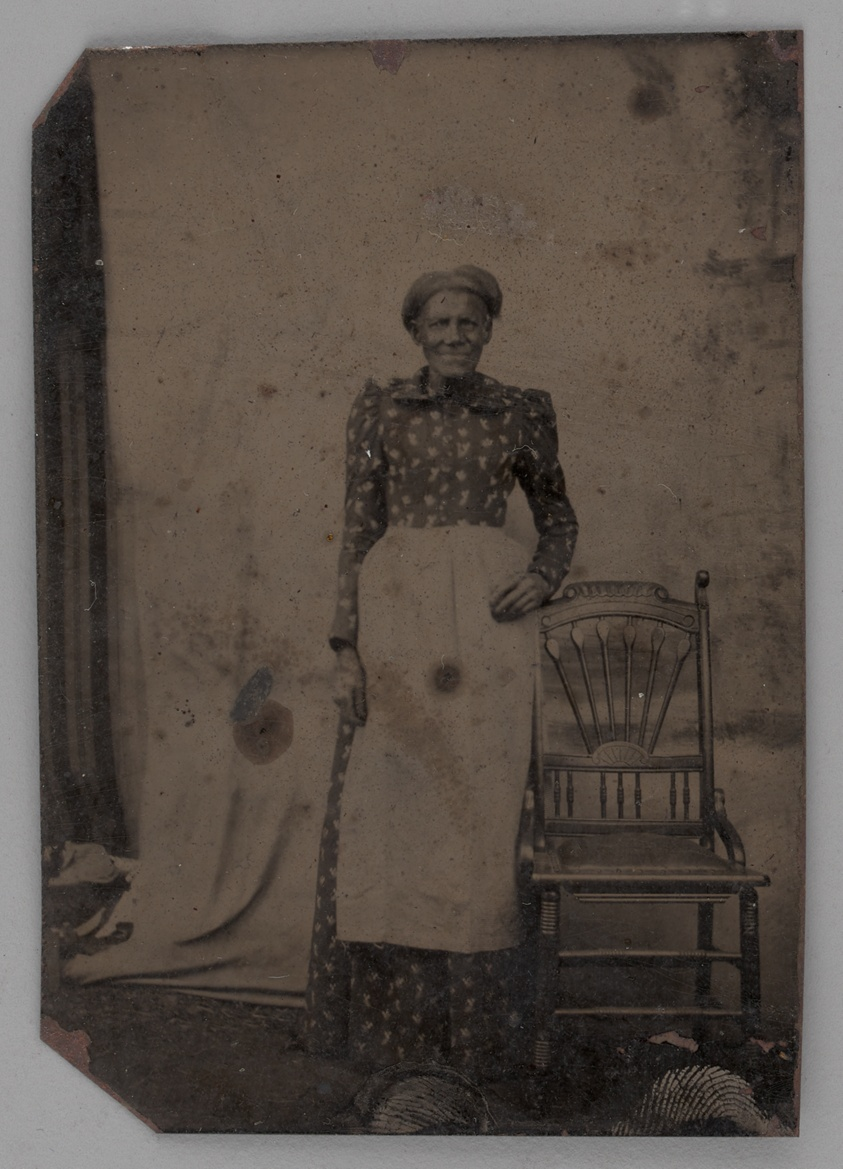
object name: Photograph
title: Untitled (Portrait of a Standing Woman)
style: 19th century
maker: Unknown maker; American, 19th century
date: 1875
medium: Tintype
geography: United States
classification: portrait; tintype; photograph; photographic process; photography; portrait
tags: portraits: African American subject, female, woman, lundberg collection, African American, portraits, portraits: female subject, portrait